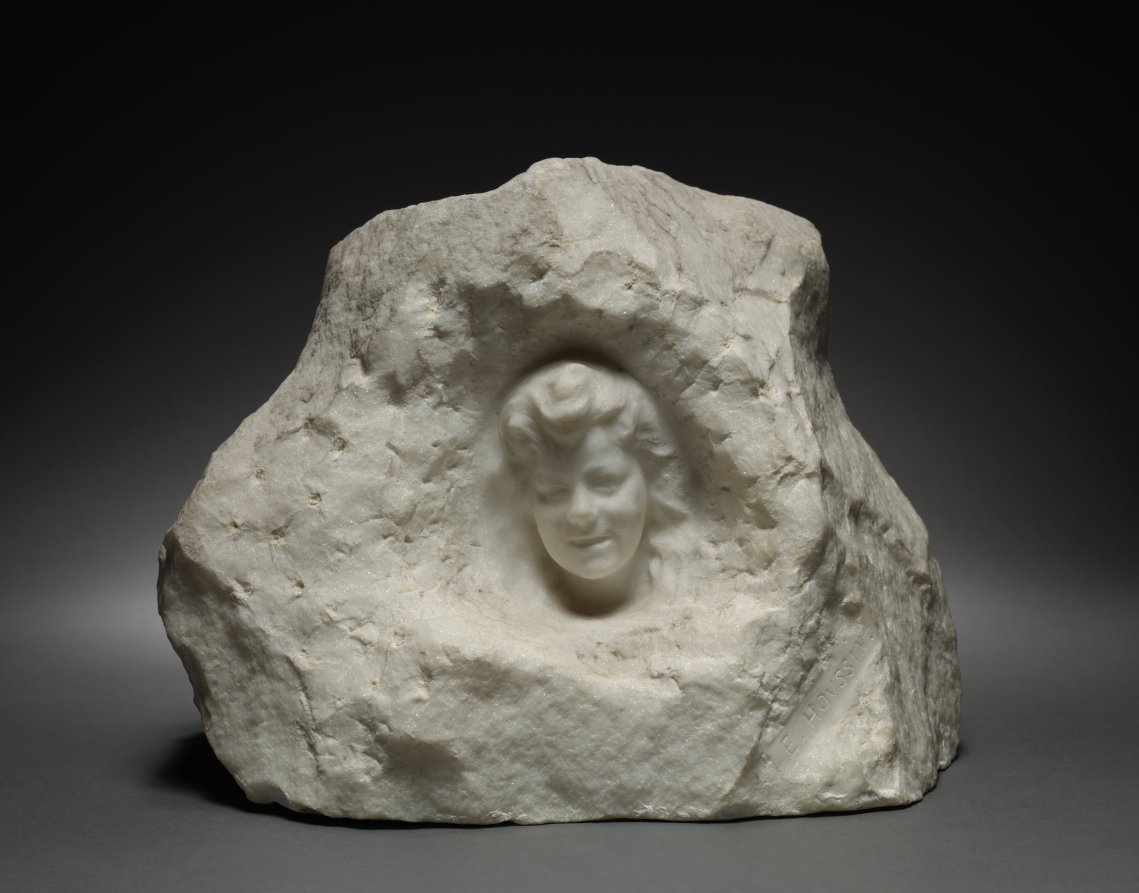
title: Head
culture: France, 19th century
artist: Édouard Charles Marie Houssin (French, 1847–1919)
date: 1893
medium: marble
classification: Sculpture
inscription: Signed lower right: "E. Hovssin"